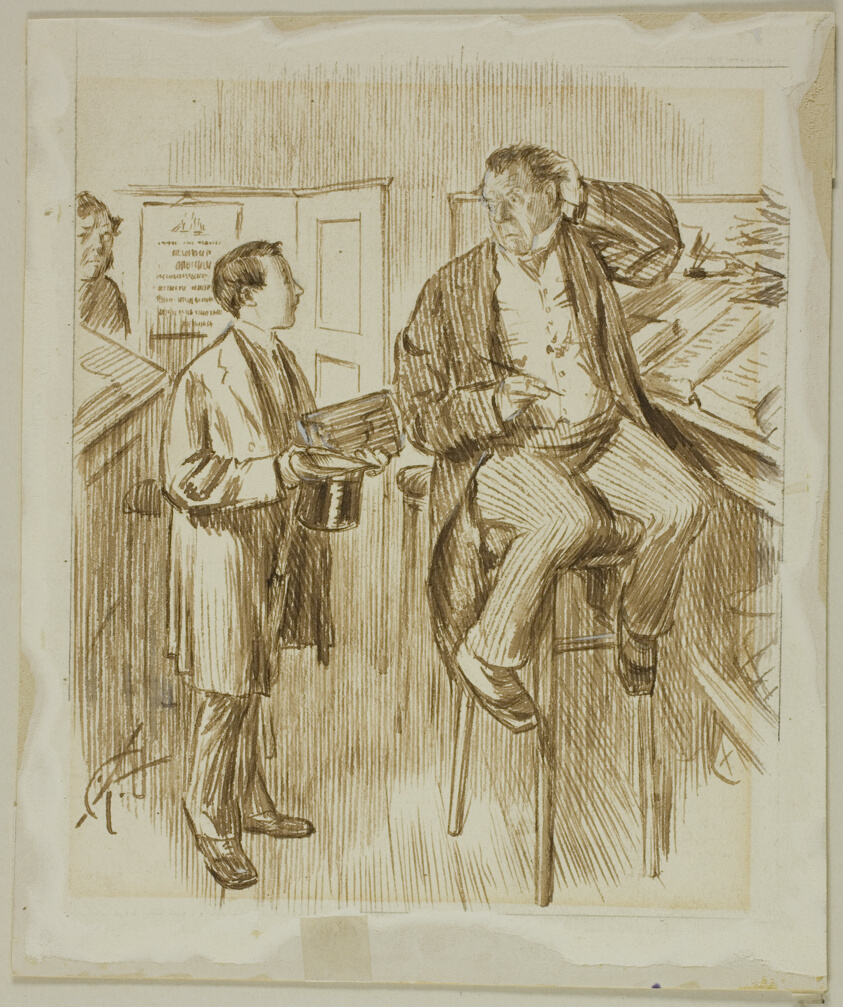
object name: Drawing and Watercolor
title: For the Third Time of Asking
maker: Charles Samuel Keene (British, 1823-1891)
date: 1870/91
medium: Pen and brown ink, with brush and brown wash and touches of white gouache, on cream wove paper, laid down on ivory wove card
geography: England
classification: pen and ink drawings; drawings (visual works); prints and drawing